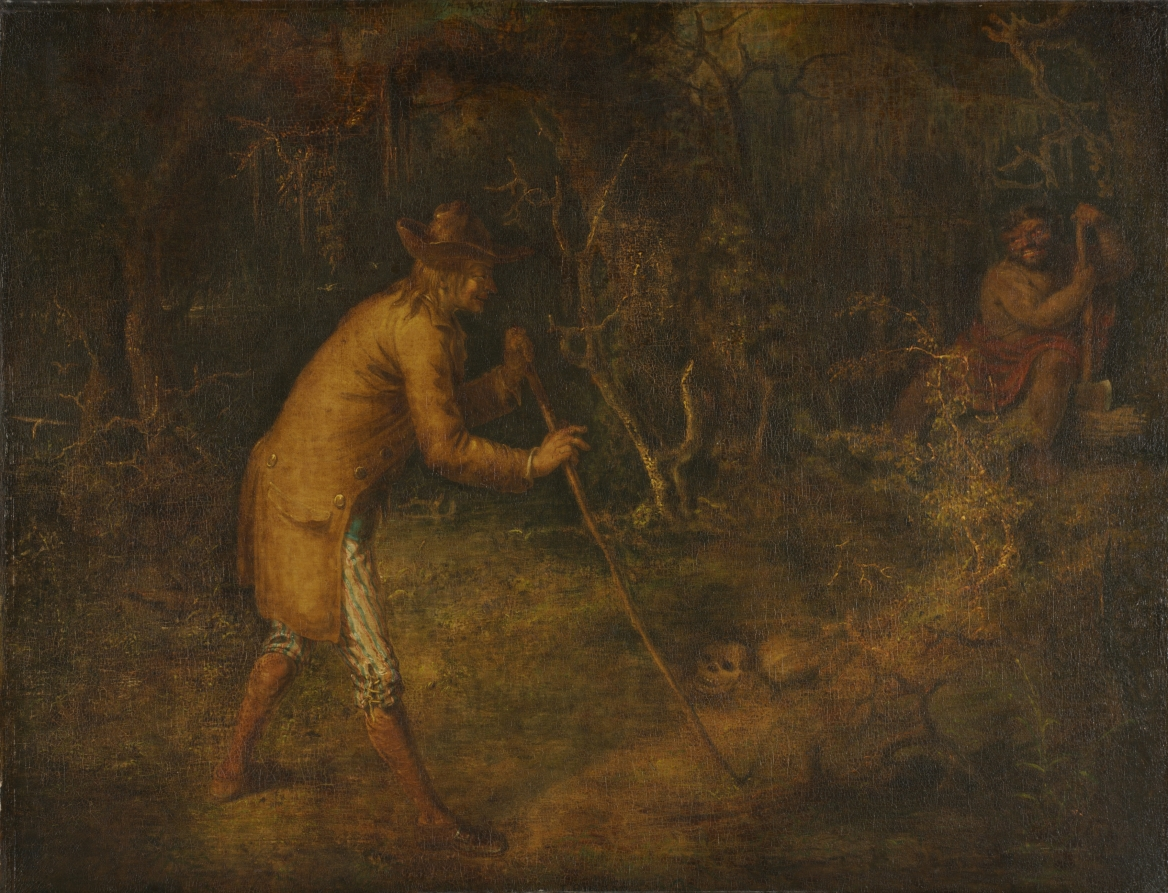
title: The Devil and Tom Walker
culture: America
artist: John Quidor (American, 1801–1881)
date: 1856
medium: oil on canvas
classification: Painting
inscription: Signed lower center: "J. Quidor / N.Y. 1856"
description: An eccentric and cantankerous man, John Quidor achieved fame in his lifetime for paintings of banners and fire engines, none of which survive. Today he is remembered for a series of fantastic, grotesque paintings based on the stories of Washington Irving (1783-1859)-a series whose exuberant style differs from the general run of American genre paintings, which tend to be more understated in mood and realistic in style. The Devil and Tom Walker belongs to this curious group of works. It portrays a scene from Irving's Tales of a Traveler (1824), in which Tom Walker, who was "not a man to be troubled with any fears," encounters the Devil while on an evening outing.